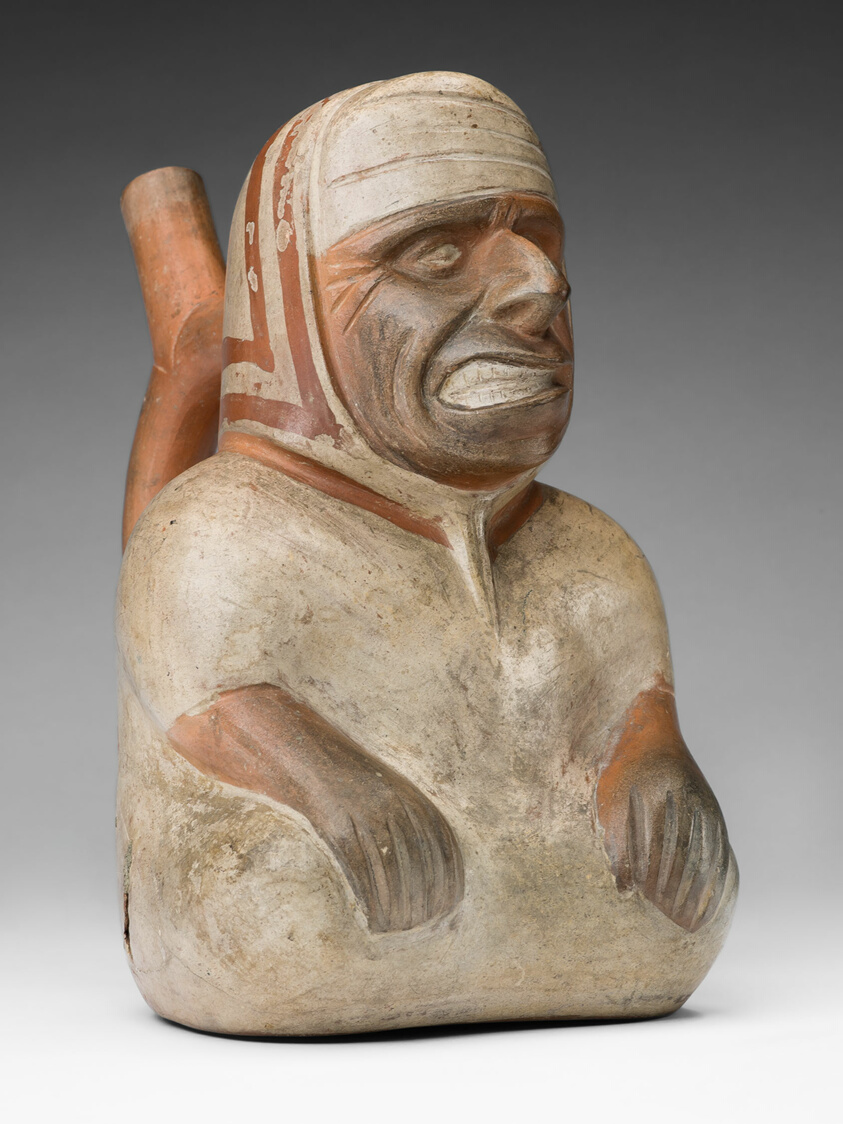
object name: Vessel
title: Portrait Vessel of a Blind Figure with Distorted Mouth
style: moche, mochica, early intermediate period, Pre-Columbian, americas, Arts of the Americas, andean, andes, south american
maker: Moche (North coast, Peru)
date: 100 BCE–500 CE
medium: Ceramic and pigment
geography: Peruvian North Coast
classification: earthenware; art of the americas; ceramics; vessel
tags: people, portraits